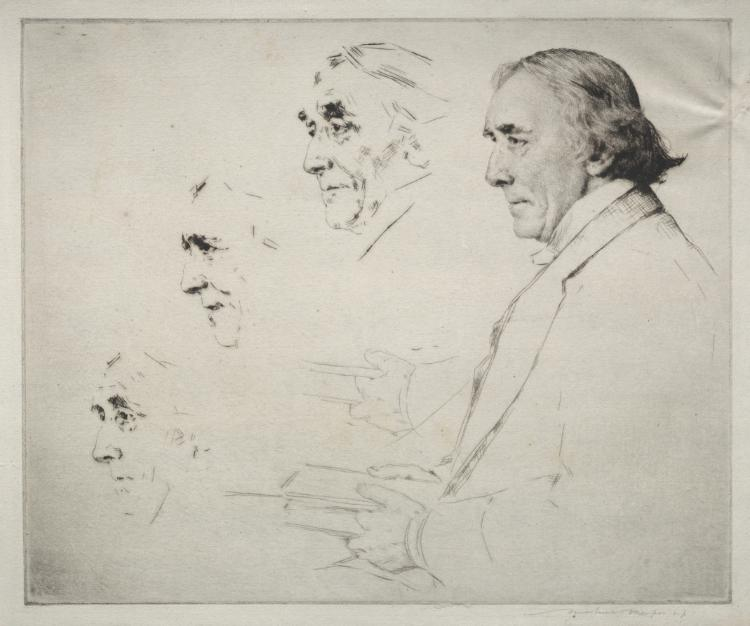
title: Sir Henry Irving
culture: England, 19th century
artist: Mortimer Menpes (British, 1860–1938)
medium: drypoint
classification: Print